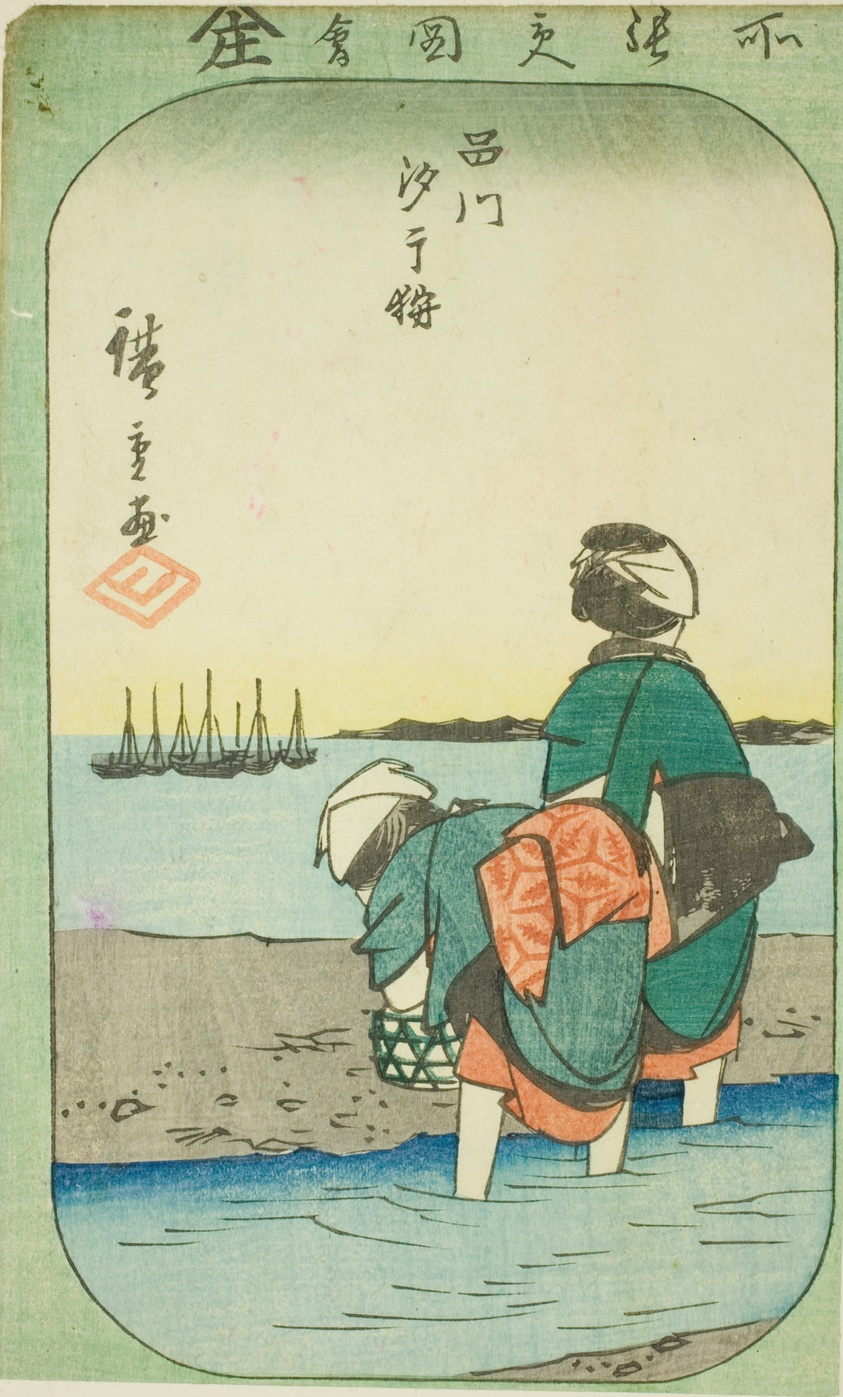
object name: Print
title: Clam Digging at Low Tide at Shinagawa (Shinagawa shiohigari), section of a sheet from the series "Cutout Pictures of Famous Places in Edo (Edo meisho harimaze zue)"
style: Japanese (culture or style)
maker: Utagawa Hiroshige 歌川 広重; Japanese, 1797-1858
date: 1857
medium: Color woodblock print; section of harimaze sheet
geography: Japan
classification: woodblock print; print; asian art